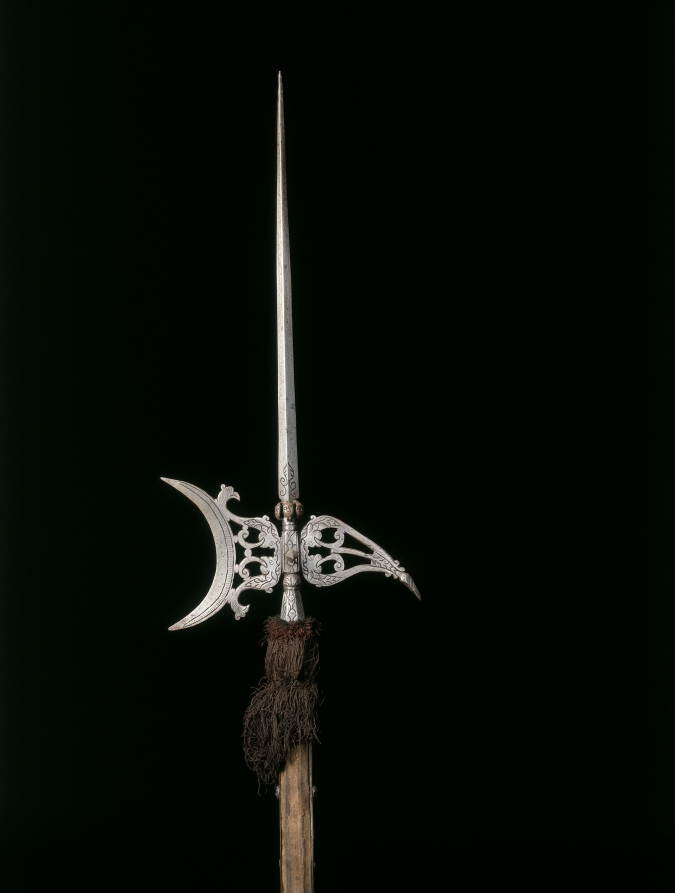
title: Parade Halberd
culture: Italy, 17th century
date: c. 1600–50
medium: steel, engraved; rectangular wood haft with planed corners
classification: Arms and Armor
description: The halberd was a staff weapon favored by European infantries (foot soldiers) of the 1400s and 1500s for its versatility and deadly effect. The word halberd comes from the German words Halm (staff) and Barte (axe). The halberd is, in fact, an axe that served multiple functions: the axe blade was used for hacking, the spike for thrusting, and the beak for piercing plate armor or for pulling a knight from his saddle. The halberd was used by shock troops (those who lead an attack) and by Swiss and German mercenaries. After about 1550, the halberd gradually became less functional. Its large blade provided space for coats of arms and insignia. By the late 1500s, the parade halberd had become a ceremonial weapon for palace guards.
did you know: Highly decorated with remains of silk tassels, this halberd was for ceremonial use.